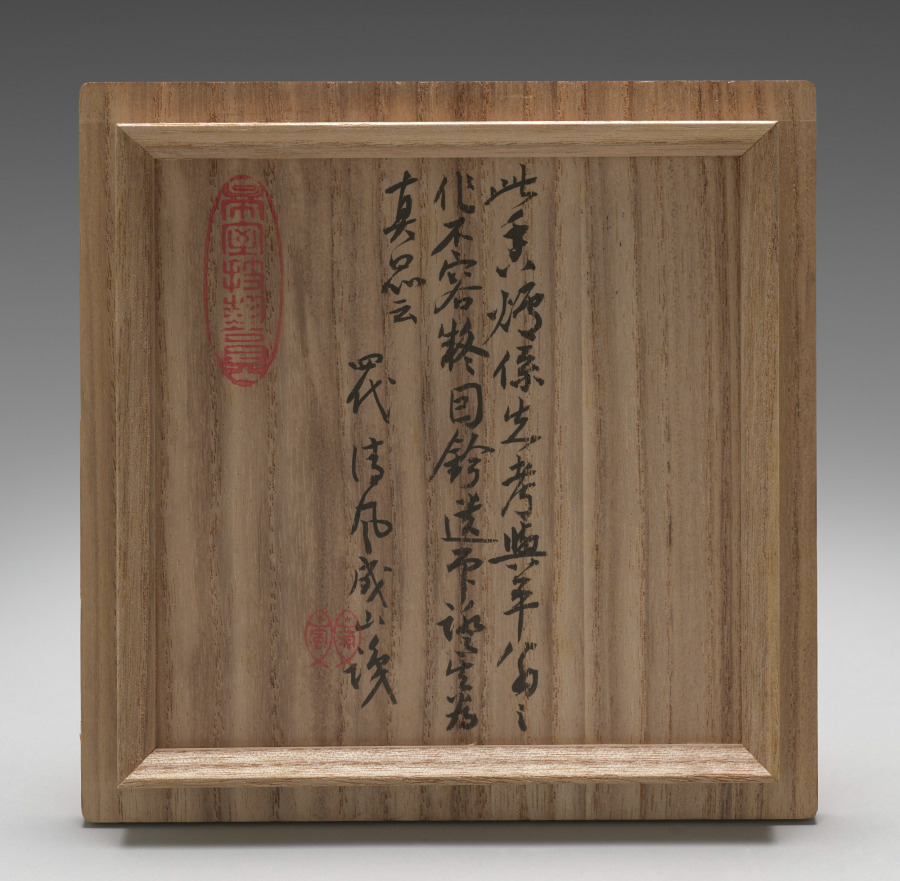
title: Incense Burner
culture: Japan, Meiji period (1868–1912)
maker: Seifū Yohei III (Japanese, 1851–1914)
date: 1893–1914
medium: Porcelain with creamy white glaze and molded design and floral openwork silver lid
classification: Ceramic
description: Yohei III made incense burners in a wide variety of designs and styles. The body and glaze of this one are taihakuji, or “great white porcelain,” an important early invention Yohei III devised in 1872. The burner has rounded, cabriole legs, resembling tiny table legs, attached to the exterior and the faintest decorative band around the bottom. Lids were produced outside the studio by metalwork specialists. For this incense burner, they created a floral-patterned silver lid.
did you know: This cylindrical incense burner has a distinctive translucent, creamy glaze over an ivory-colored clay body.